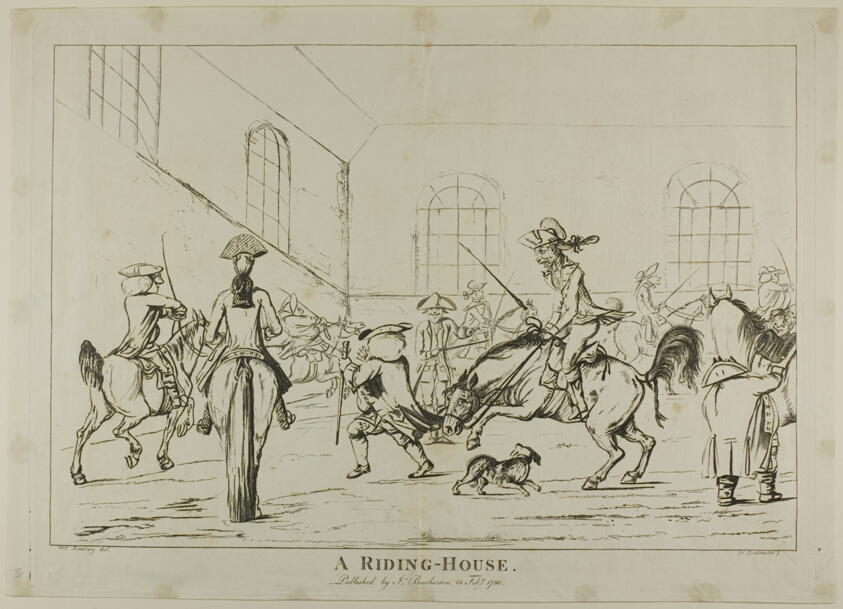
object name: Print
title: A Riding House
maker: Unknown Artist; published by Bretherton (English)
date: published 1780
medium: Etching on paper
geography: England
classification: etching; print; prints and drawing